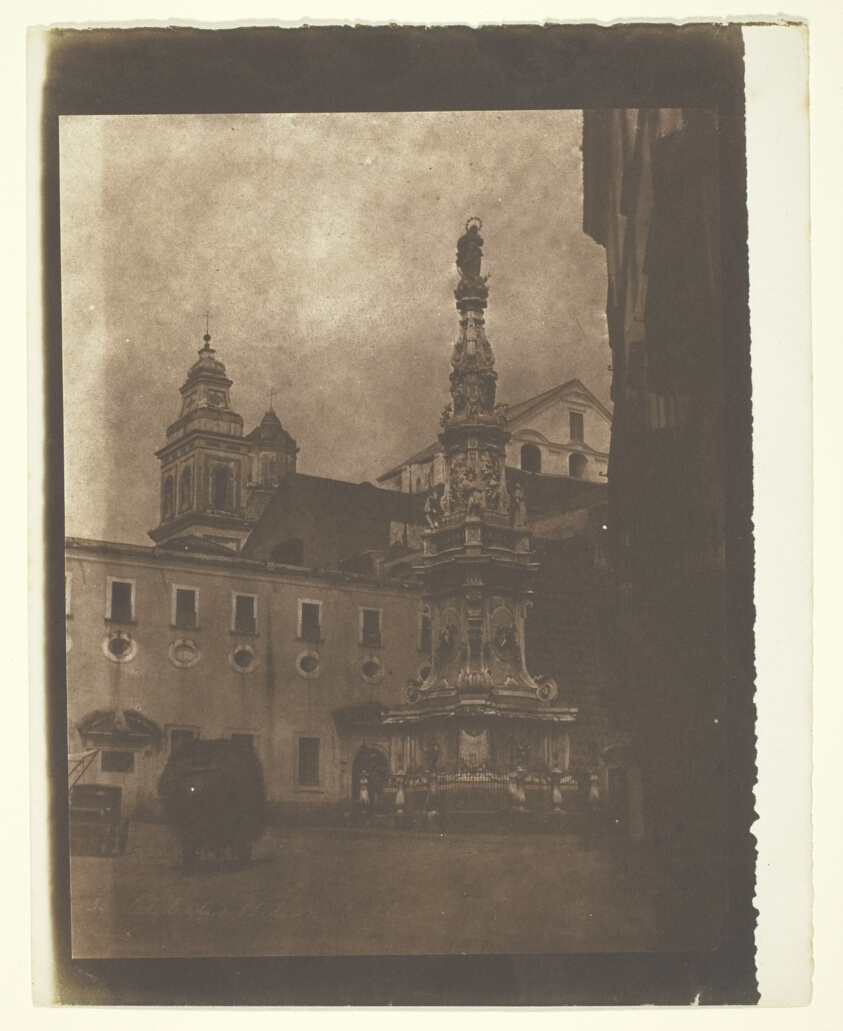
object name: Photograph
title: Celebrated Obelisk, Naples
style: 19th century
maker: Rev. Calvert R. Jones (Welsh, 1804–1877)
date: 1846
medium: Salted paper print from a calotype negative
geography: England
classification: salted paper print; photographic process; photography; photograph